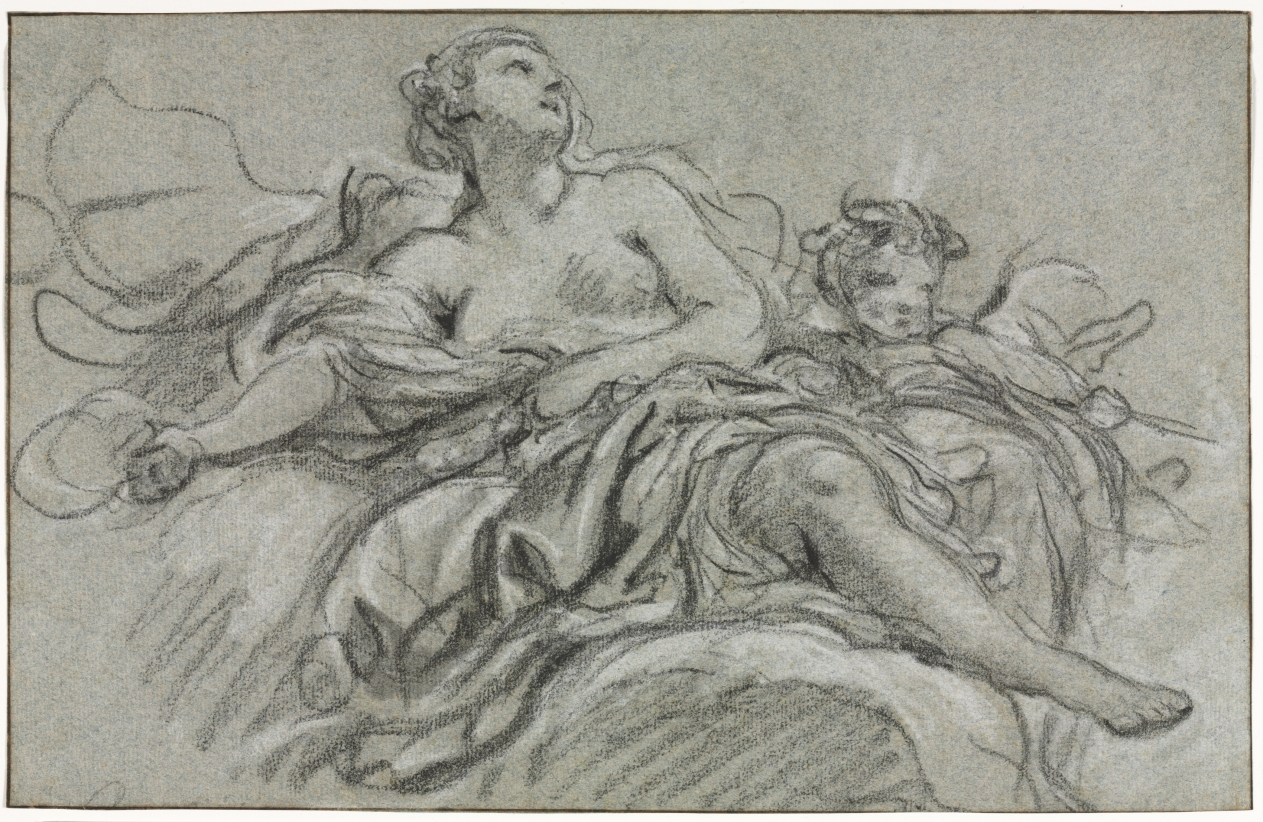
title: Venus and Cupid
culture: France, 18th century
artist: François Boucher (French, 1703–1770)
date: second or third quarter 18th century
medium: Black chalk with stumping heightened with white chalk on blue laid paper; framing lines in brown ink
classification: Drawing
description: Although this sketch is similar to drawings by Boucher, a talented pupil or another artist striving to emulate Boucher probably made it.